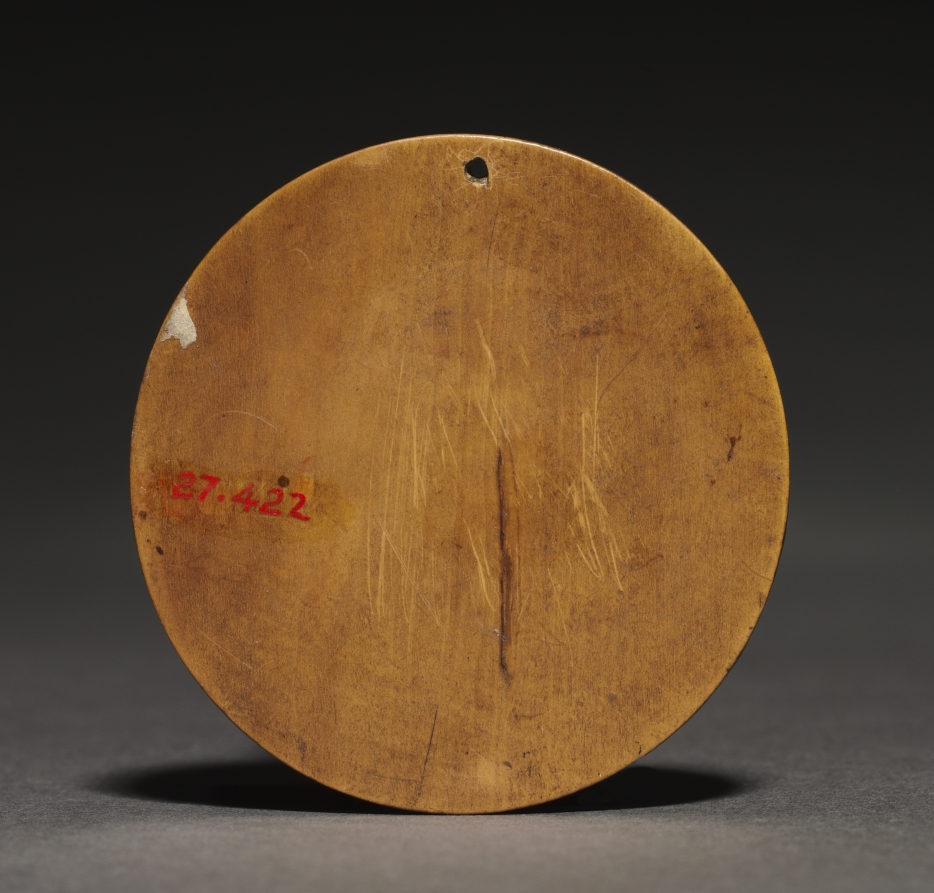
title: Portrait of a Man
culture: Germany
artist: Christoph Weiditz (German, c. 1500–1559)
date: 1523–1536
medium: boxwood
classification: Sculpture